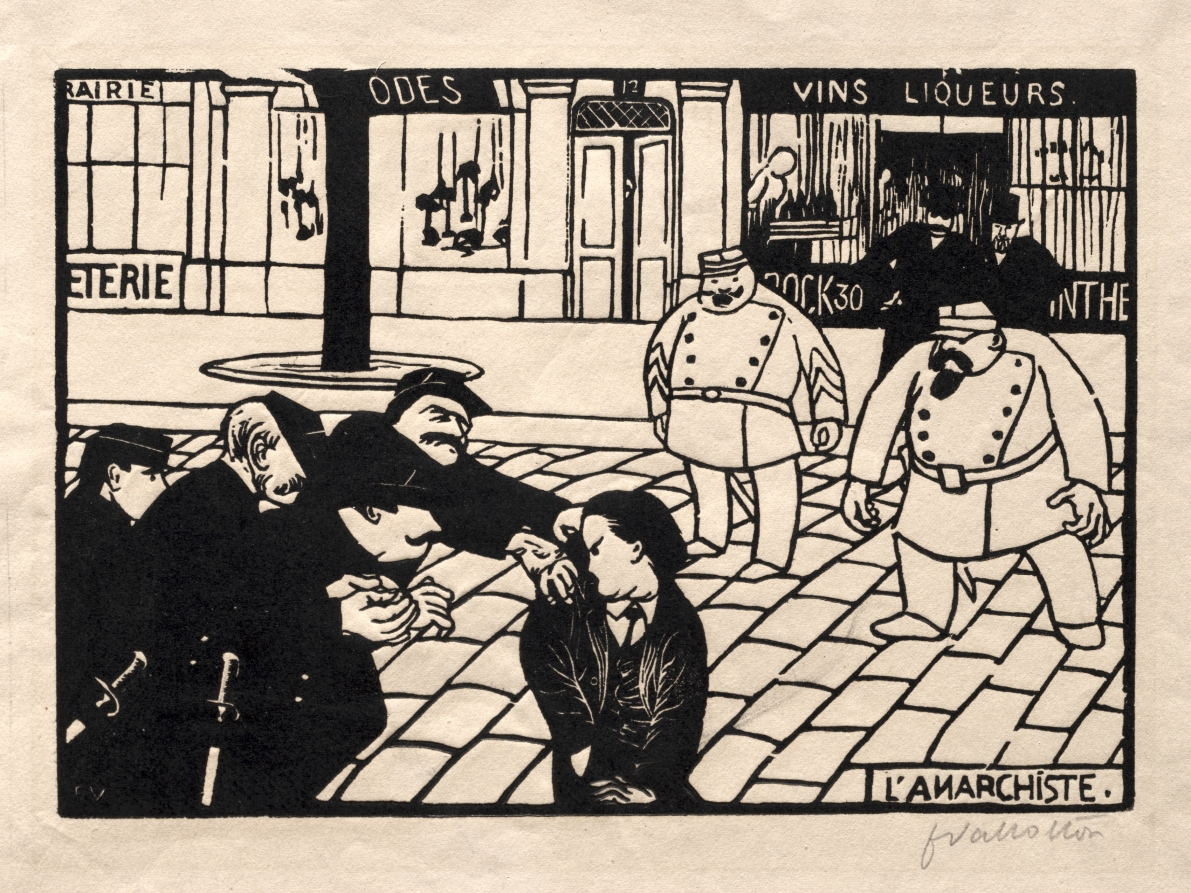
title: The Anarchist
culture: France, late 19th-early 20th century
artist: Félix Vallotton (Swiss French, 1865–1925)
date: 1892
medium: woodcut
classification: Print